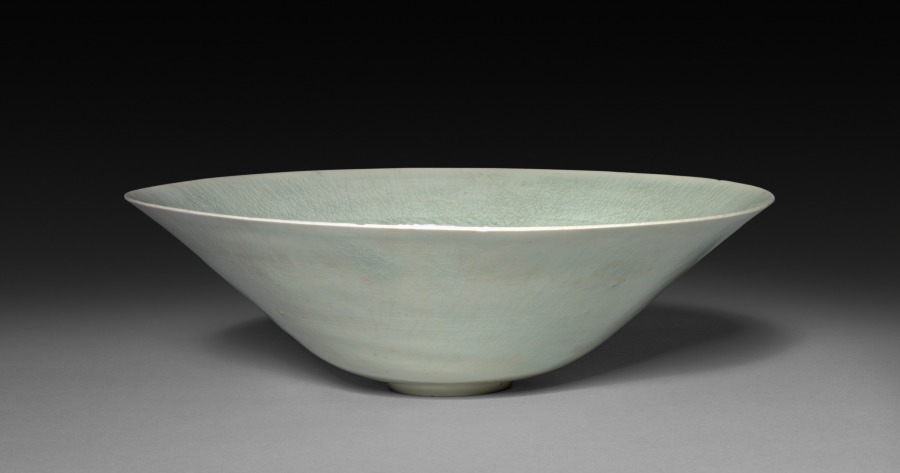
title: Coniform Bowl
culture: China, Song dynasty (960-1279)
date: 960–1279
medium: White porcelain, Yingqing ware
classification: Ceramic